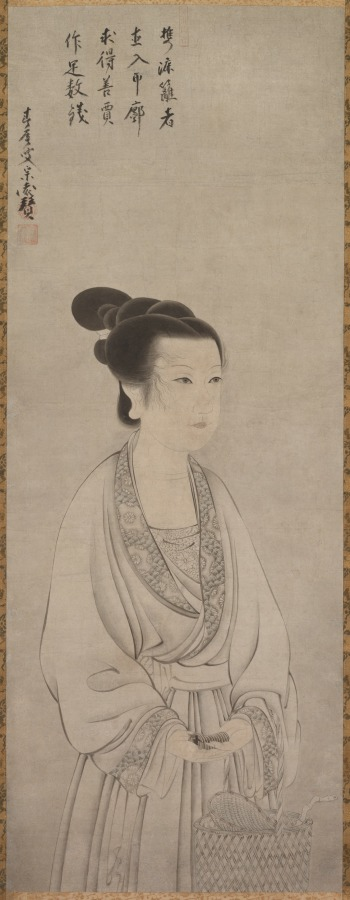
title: Rei Shōjo (Ling Zhaonu)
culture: Japan, Muromachi period (1392–1573)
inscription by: Shunoku Sōen (Japanese, 1529–1611)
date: 1500s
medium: hanging scroll, ink and light color on paper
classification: Painting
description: Legend has it that Chinese beauty Ling Zhaonu, whose name is pronounced Rei Shōjo in Japanese, was a model of devotion to her parents. She put great effort into selling baskets made by her elderly father, a devout Buddhist, thereby keeping the family afloat financially. The verse on the painting relates her story, and was inscribed by a Zen monk.